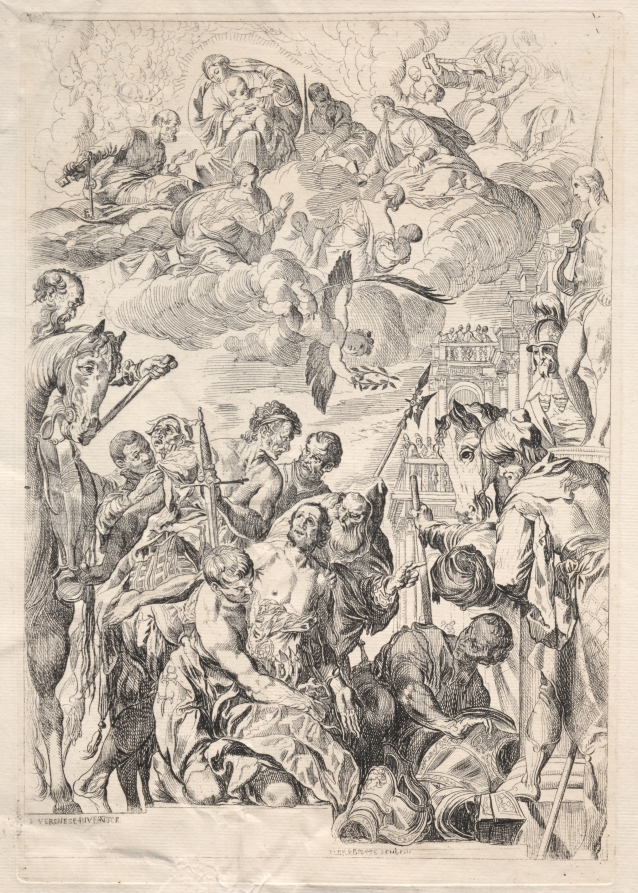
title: St. George Preparing for His Martyrdom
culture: France, 17th century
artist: Pierre Brébiette (French, c. 1598-c. 1650)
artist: after Paolo Veronese (Italian, 1528–1588)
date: 1600s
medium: engraving and etching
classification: Print